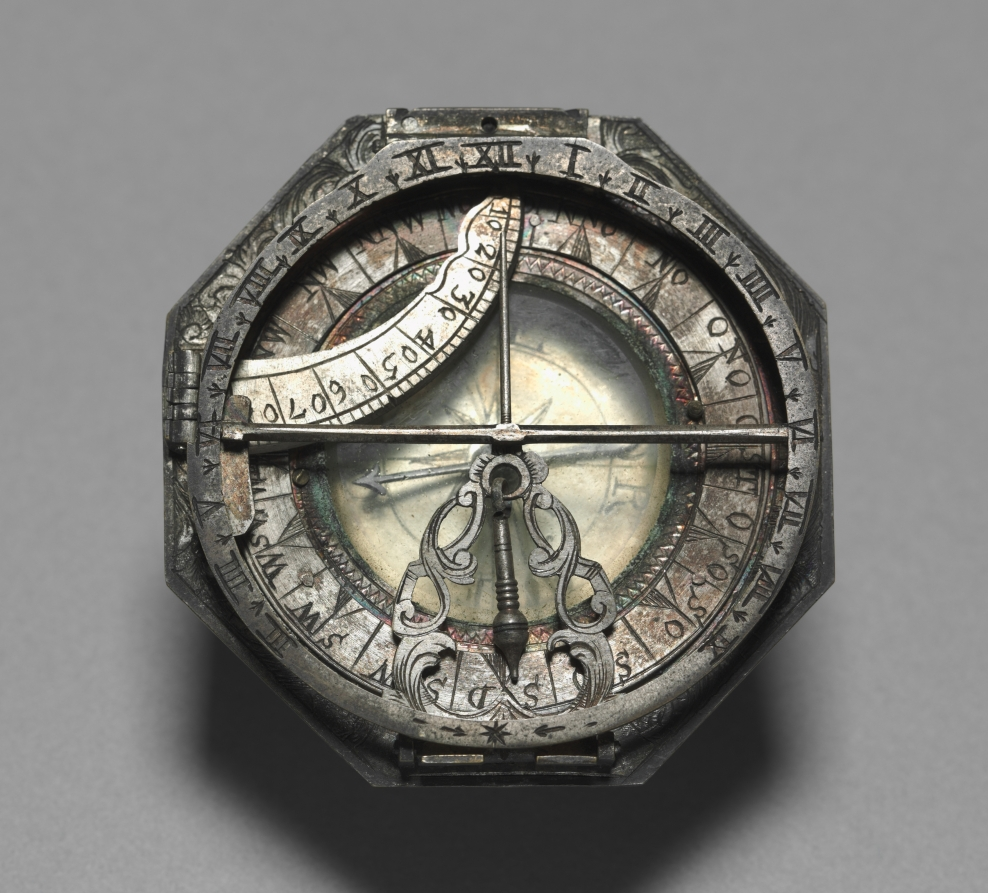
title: Compass and Sun Dial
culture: Germany, Augsburg(?), 18th century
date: 1700–1750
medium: silver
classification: Silver